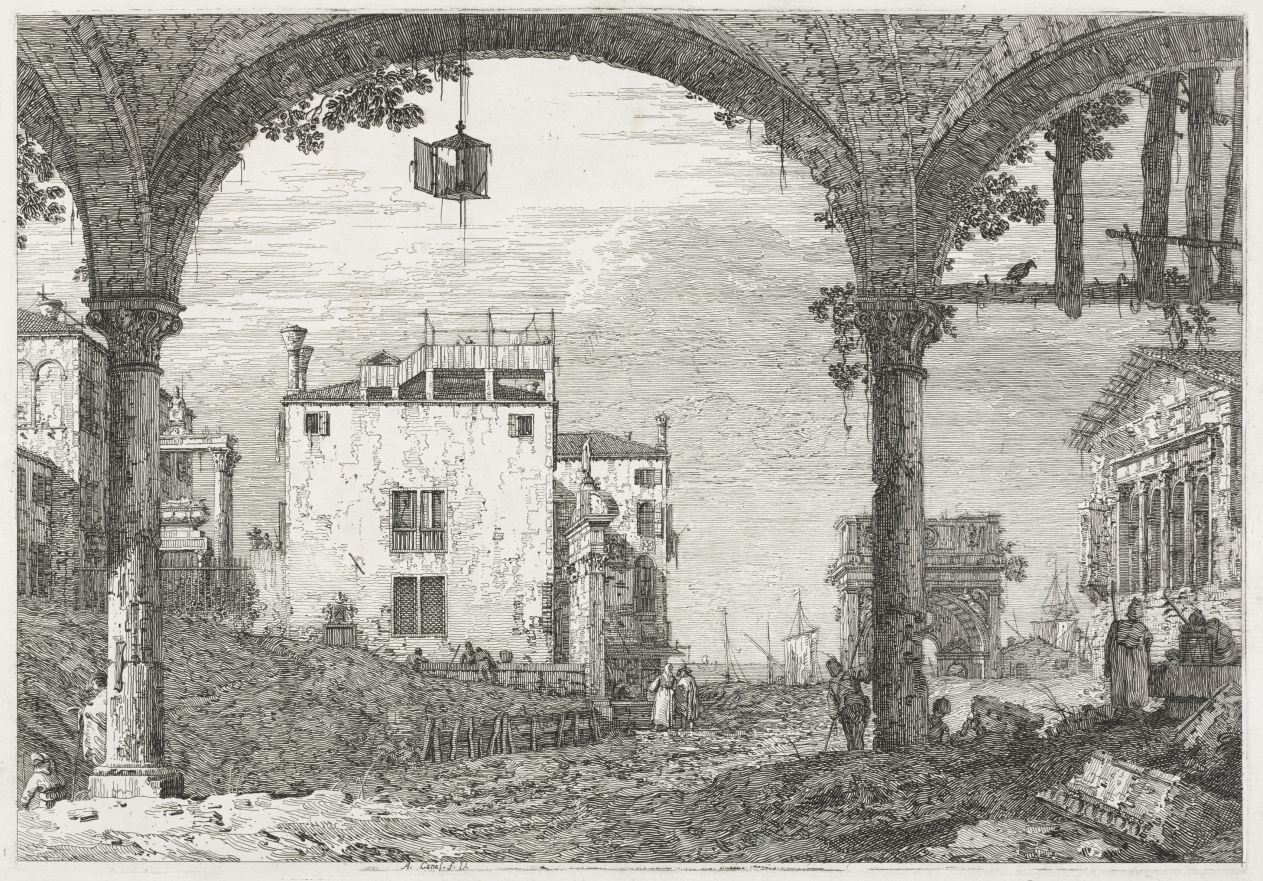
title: Views: The Portico with the Lantern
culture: Italy, Venice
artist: Antonio Canaletto (Italian, 1697–1768)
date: 1735–1746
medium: etching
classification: Print